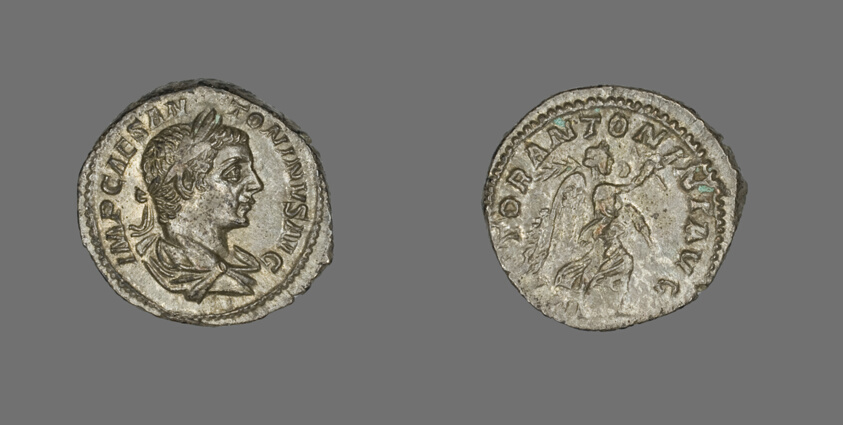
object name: Coin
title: Denarius (Coin) Portraying Emperor Elagabalus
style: roman (ancient, style or period)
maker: Roman, minted in Rome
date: 218-222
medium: Silver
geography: Roman Empire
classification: coin; ancient art